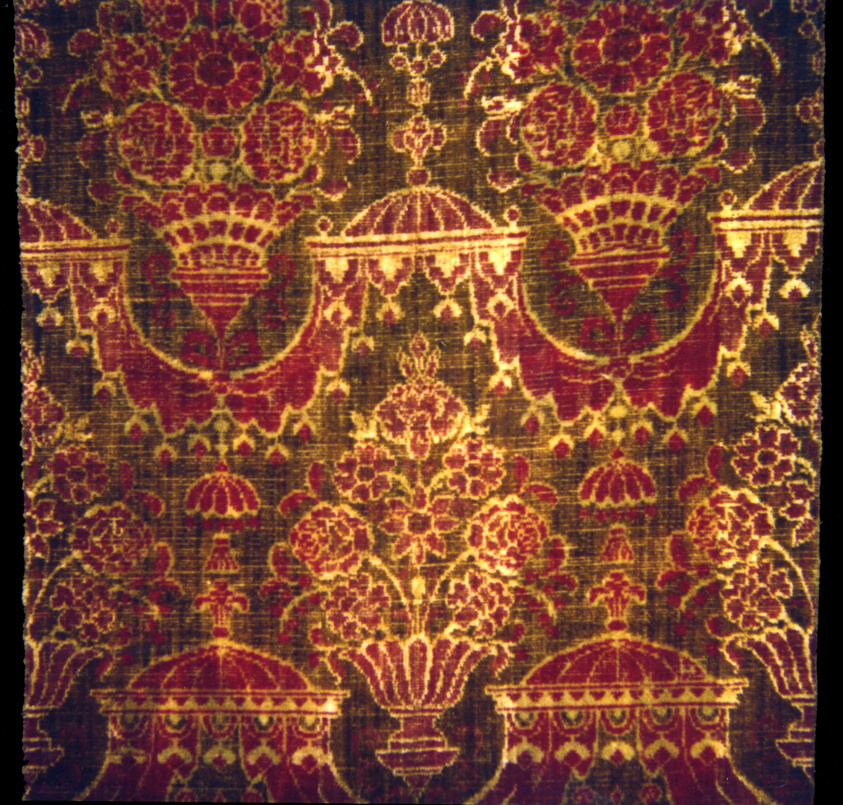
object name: Textile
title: Panel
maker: Possibly France, Flanders, or the Netherlands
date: 18th century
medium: Linen and wool, plain weave with three-color supplementary pile warps forming cut solid velvet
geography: France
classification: textile; weaving - velvet